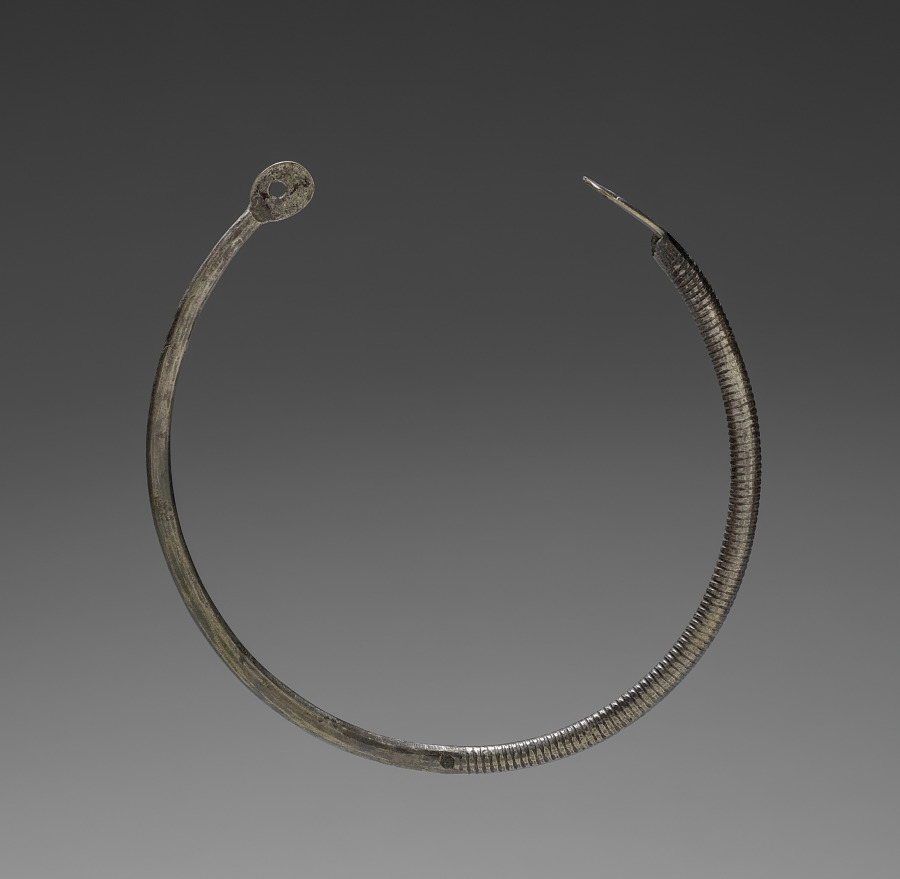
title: Nose Ring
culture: Indo-Chinese, made in France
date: 20th Century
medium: silver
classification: Jewelry